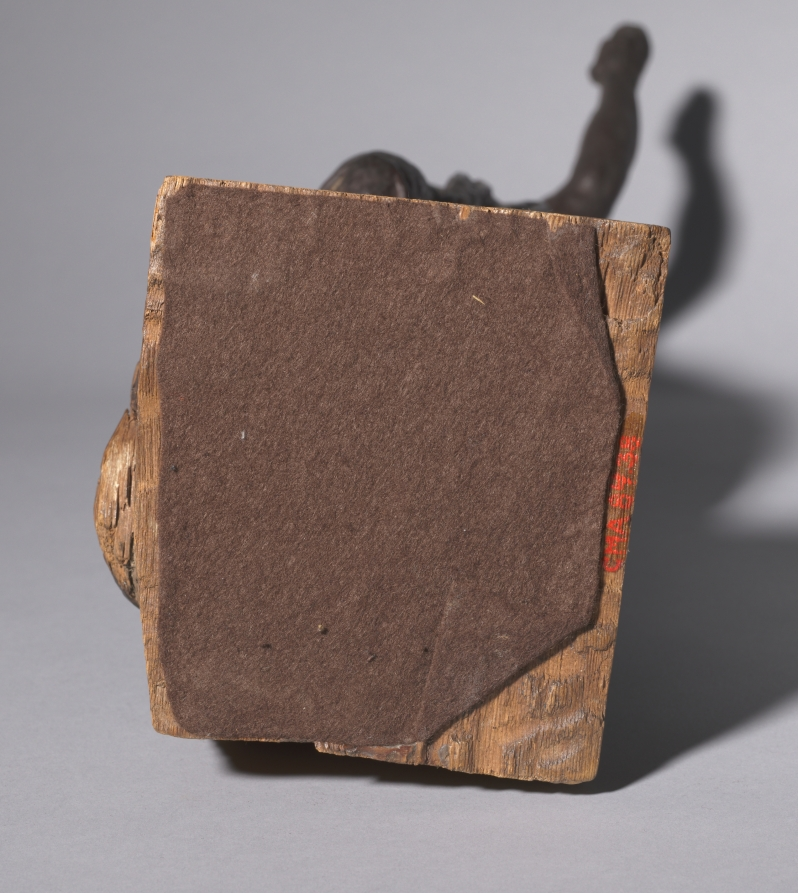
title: Model for an Angel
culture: Italy, Milan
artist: Annibale Fontana (Italian, 1540–1587)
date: c. 1583–84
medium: wax on a metal armature, mounted on wood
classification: Sculpture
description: Annibale Fontana created this wax model, perhaps in part for the patron’s approval, while preparing a sculpture for the Church of Santa Maria presso San Celso in Milan. The angel was mounted high on the facade, so the composition needed to be impeccably balanced as well as legible from the ground. Wings and a trumpet appear in the final work, but Fontana here concentrates on the deep folds, clinging drapery, and forceful pose.